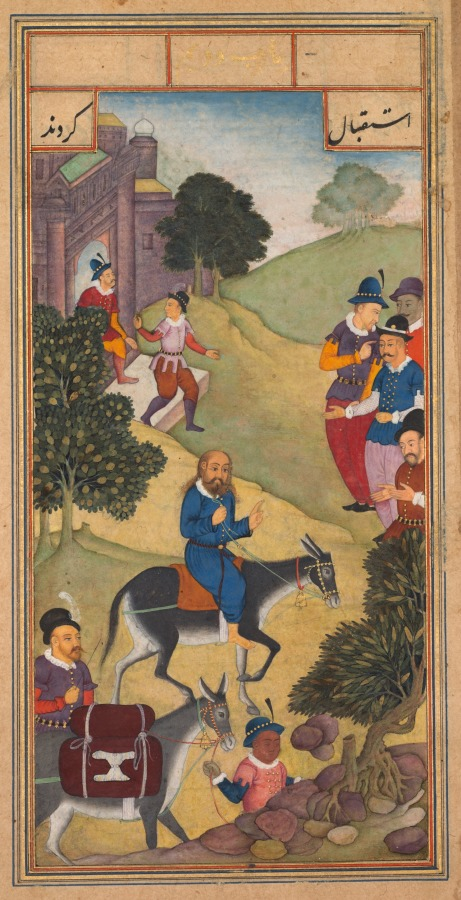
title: The Entry into Jerusalem (folio 156 recto), from a Mirror of Holiness (Mir’at al-quds) of Father Jerome Xavier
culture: Mughal India, Allahabad, made for Prince Salim (1569–1627)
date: 1602–4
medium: Gum tempera, ink, color, and gold on paper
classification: Manuscript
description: Jesus rides astride a female donkey, as specified in the text, and he greets a group of four men, two of whom seem to welcome him with hands extended. He follows the road to the gates of Jerusalem, which appear in the upper left corner. Father Jerome devoted only three short lines to this episode, so perhaps its selection for illustration is connected to an old and popular Islamic saying: “If Jesus’s donkey is taken to Mecca, when it comes back it will still be a donkey.”